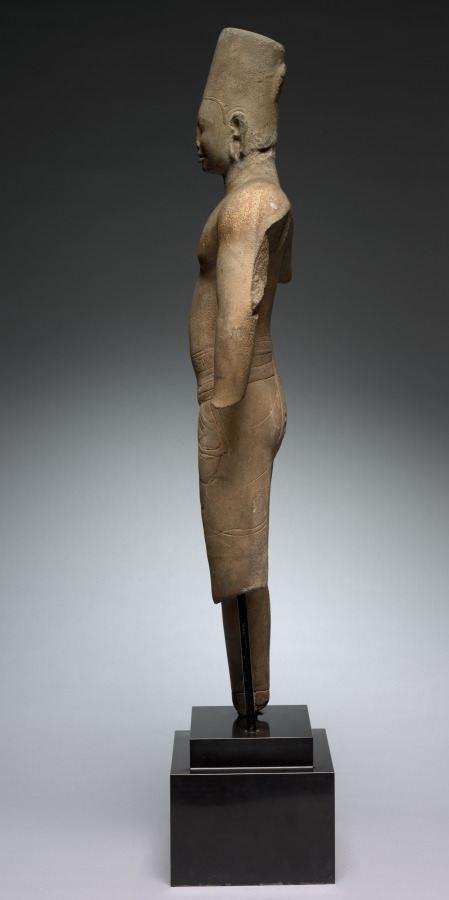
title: Vishnu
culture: Cambodia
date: 650–99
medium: gray sandstone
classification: Sculpture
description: The muscular physique, sensitive smile, and flat-topped high crown are characteristics of Vishnu images made during the pre-Angkorian period (c. 550–802) in Cambodia. This sculpture probably was the sole object of worship in a small brick temple sanctum.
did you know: The god wears a short garment (sampot) tied to form a loop on the left with the hanging ends on the right thigh.